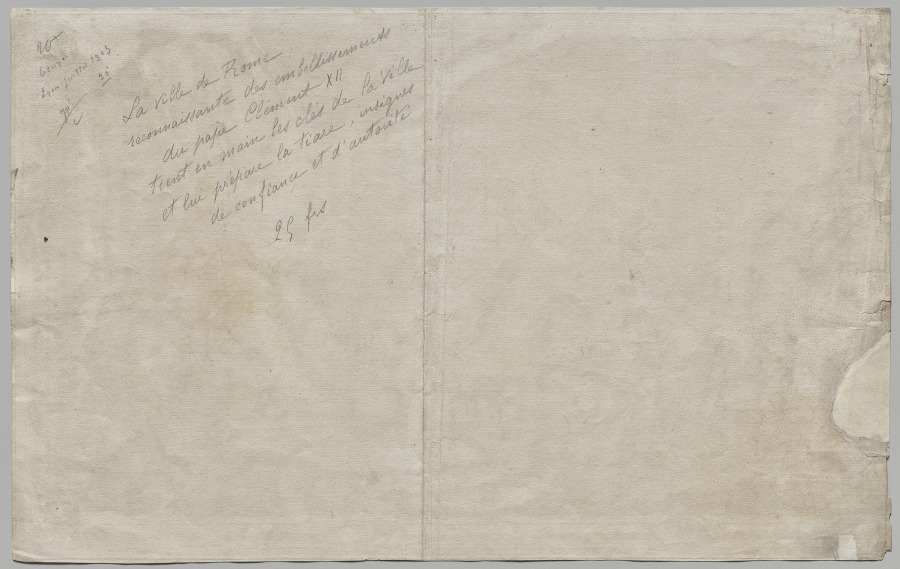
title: Nuova pianta di Roma data in luce da Giambattista Nolli l’anno MDCCXLVII, known as La Pianta Grande di Roma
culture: Italy, 18th century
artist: Giovanni Battista Nolli (Italian, 1701–1756)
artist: Carlo Nolli (Italian, 1690–1790)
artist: Rocco Pozzi (Italian, 1701–1774)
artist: Pietro Campana de Soriano (Italian, 1725–c. 1779)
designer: Stefano Pozzi (Italian, 1699–1768)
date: 1748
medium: etching and engraving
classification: Print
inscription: Written in pencil on verso: "20+/[illegible] Lyon [illegible] 1903/[illegible] 20/La vielle de Rome, reconnaissante des embellissements/du Pape Clement XII/tient en main les clefs de la ville/et lui prepare la tiare, insignes/de confiance et d'authorite/25 frs (?)"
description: The monumental Pianta Grande di Roma, or Large Plan of Rome, which measures about 5 x 7 feet when its twelve plates are assembled, is a landmark in both cartography and printmaking. The map is considered the first scientific rendering of Rome, establishing new standards of accuracy and thoroughness when it was published in 1748. Devised by the Lombard architect and surveyor Giovanni Battista Nolli (Italian, 1701-56), the creation of the map required over ten years of surveying the city carried out by Nolli and a team of assistants with the help of new measuring devices. In Nolli’s “ichnographic” (also called “ground”) plan, architectural features and the urban infrastructure are reduced to a single horizontal slice, a minutely detailed footprint that conveys dimensions, proportions, and orientations to scale with the utmost clarity.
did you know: To make this map, Pope Clement XII granted the mapmaker permission to measure courtyards and other interior, inaccessible spaces in monastic communities, even those in nuns’ convents, which was controversial at the time.